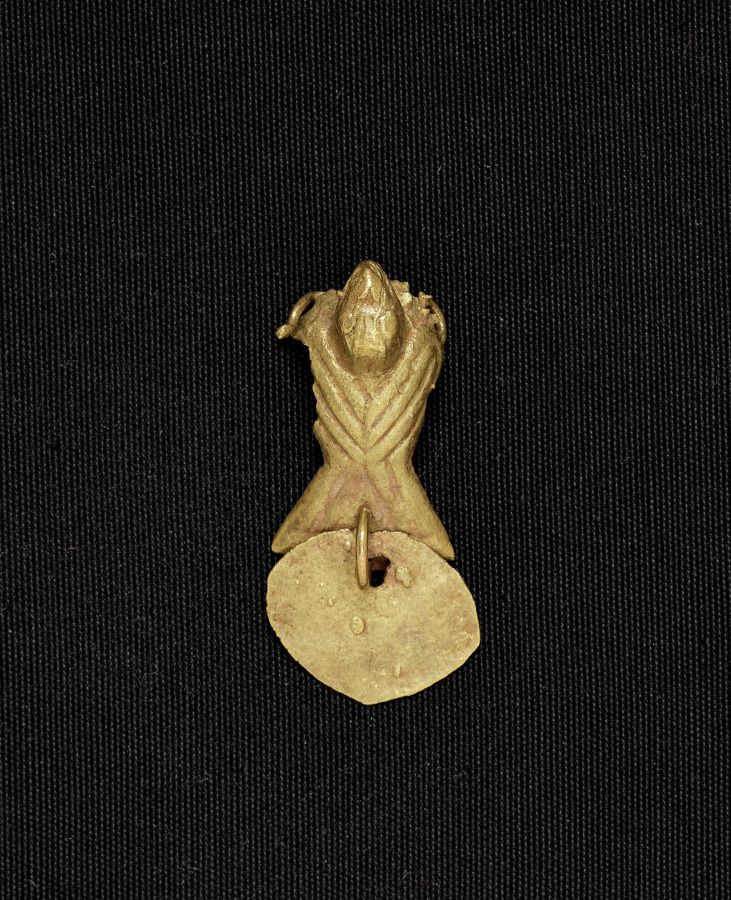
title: Bird Bead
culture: Colombia, Muisca style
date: c. 900–1550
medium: cast gold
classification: Jewelry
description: Muisca metalwork divides into two categories: ornaments to be worn, such as these, and offering figurines, in the case to the right. The elaborate bird pendant features delicate herringbone moldings, openwork patterns, and wing details-all part of the wax model from which the pendant was cast (see nearby computer animation). The dangles were attached after casting.